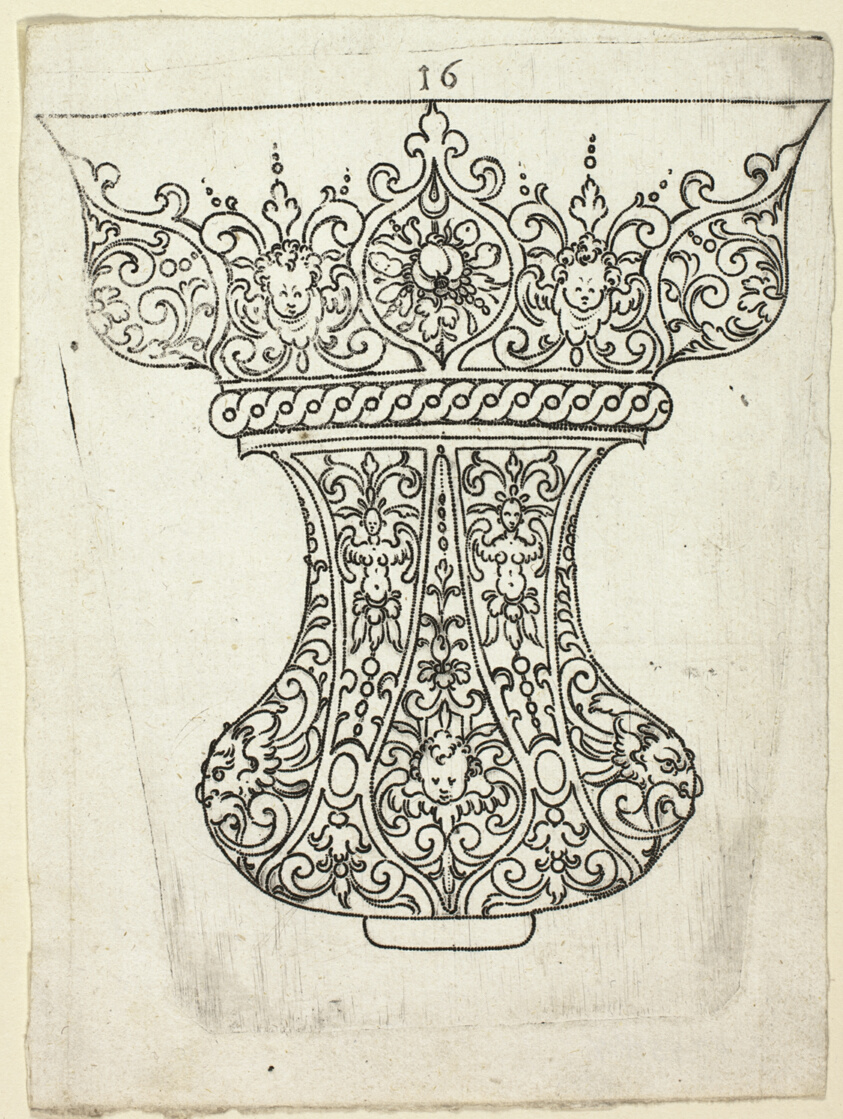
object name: Print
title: Plate 16, from XX Stuck zum (ornamental designs for goblets and beakers)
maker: Master A.P. (German, active early 17th century)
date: 1601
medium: Punch engraving in black on ivory laid paper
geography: Germany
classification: engraving; print; prints and drawing